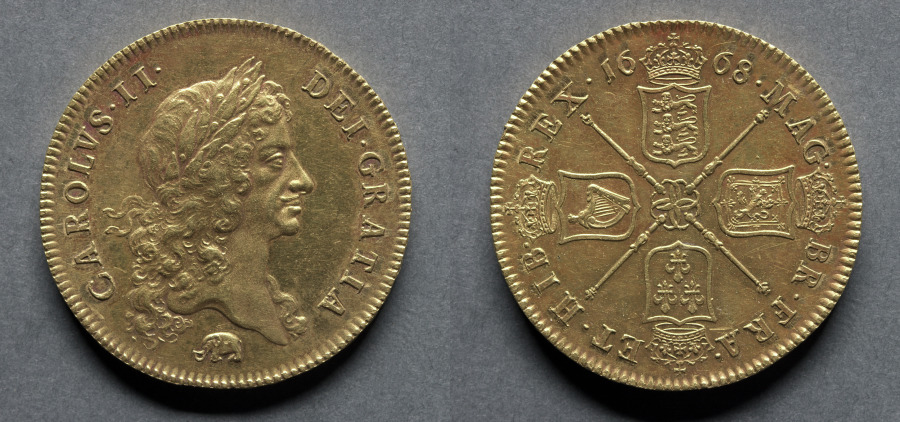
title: Five Guineas: Charles II (obverse); Four Shields (reverse)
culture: England, Charles II, 1660-1685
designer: John Roettier (British, 1631–1703)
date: 1668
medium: gold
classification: Coins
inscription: CAROLVS . II. DEI . GRATIA.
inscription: DECUS ET TUTAMEN ANNO REGNI VICESIMO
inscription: MAG BR FRA ET HIB REX 1668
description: Once the decision was made to reform the coinage of England, and hammered coinage abandoned, the whole range of money was simplified. The guinea was the unit (like the dollar), and multiples of two and five were struck. One of the reasons for turning to mill coins was the long battle against the clipper (the act of shaving precious metal off coins for profit) and forger of coins. Not only were mill coins more exactly shaped, they were thick enough in larger denominations for a legend to be written on their edge as a protection against chipping. Here the edge legend translates: "An Ornament and a safeguard. In the—year of our reign." The regnal year starts from the day the king ascends the throne. Thus the first regnal year of Charles II was calculated from the death of his father, Charles I, in 1649. The year 1668 was therefore the 19th (20th regnal) year of Charles I, whose regnal years ran from January 30 in one year to January 29 of the next.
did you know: The name guinea came from the gold where it was mined, the so-called Gold Coast of Africa on the Gulf of Guinea.